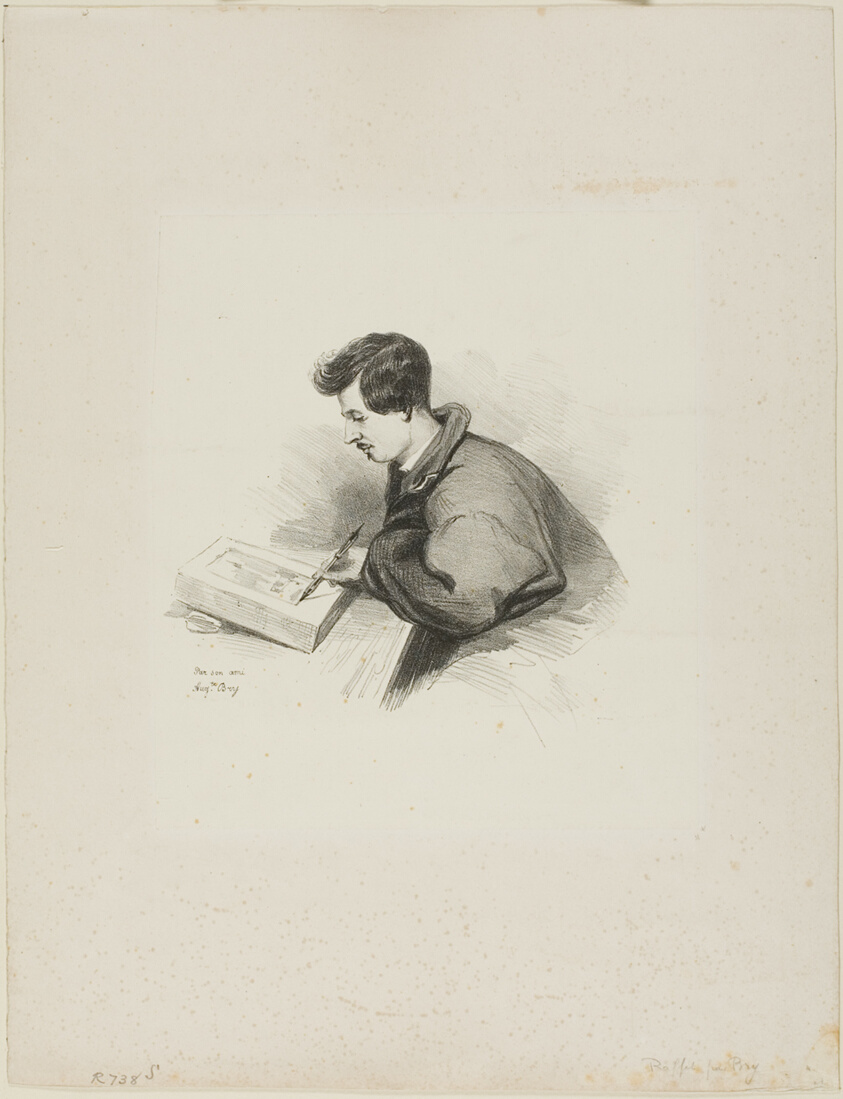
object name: Print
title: Portrait of Auguste Raffet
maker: Auguste Bry (French, 19th century)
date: 1839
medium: Lithograph in black on ivory China paper, laid down on white wove paper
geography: France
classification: lithograph; print; prints and drawing